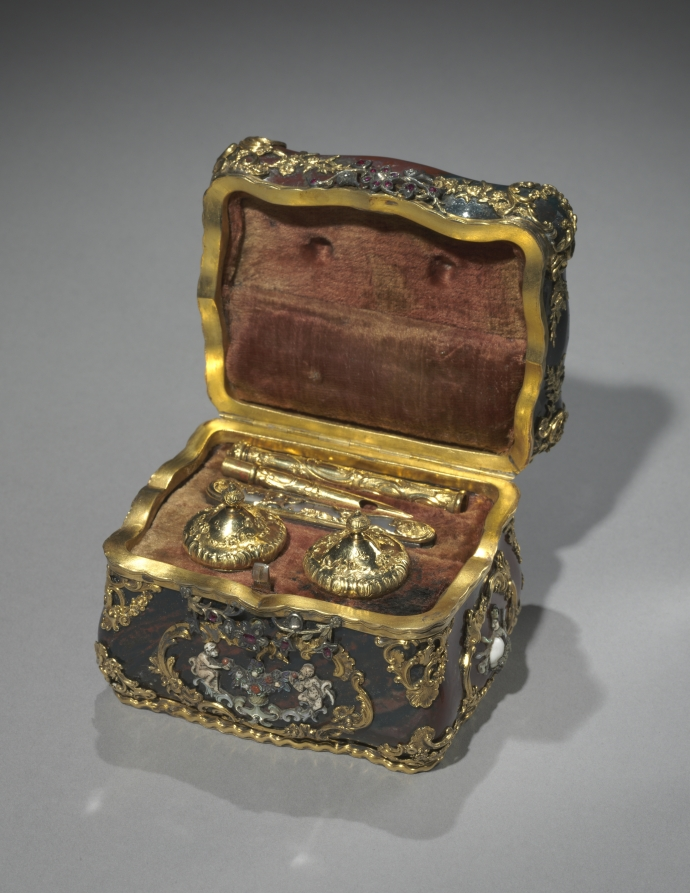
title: Inkstand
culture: Continental, 19th century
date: 1800s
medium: fused red and green glass (?) mounted with gold, pearl, jewels; interior lined with velvet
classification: Miscellaneous